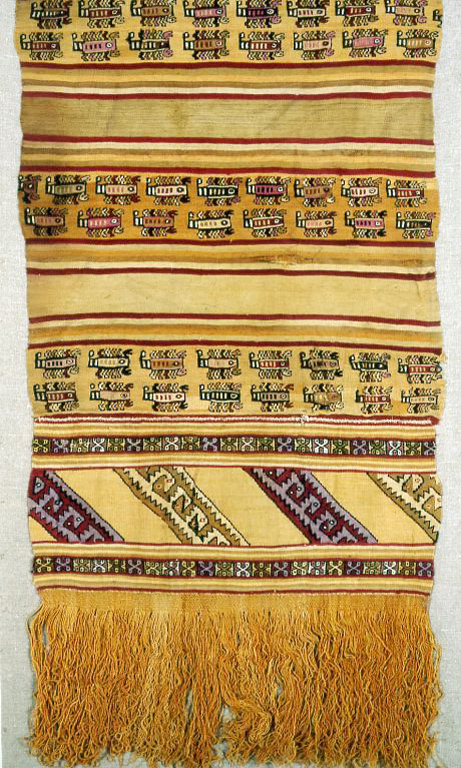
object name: Textile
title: Border Fragment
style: chancay, inca, late intermediate period, Pre-Columbian, americas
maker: Chancay (Central coast, Peru)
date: A.D. 1000/1476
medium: Cotton and wool (camelid), bands of plain weave, slit tapestry weave with wrapping outlining wefts, and three-color complementary weft weave; edged with plain weave extended weft loop fringe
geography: Peru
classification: weaving; textile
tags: insects, birds, lines, scorpions, stepped motif